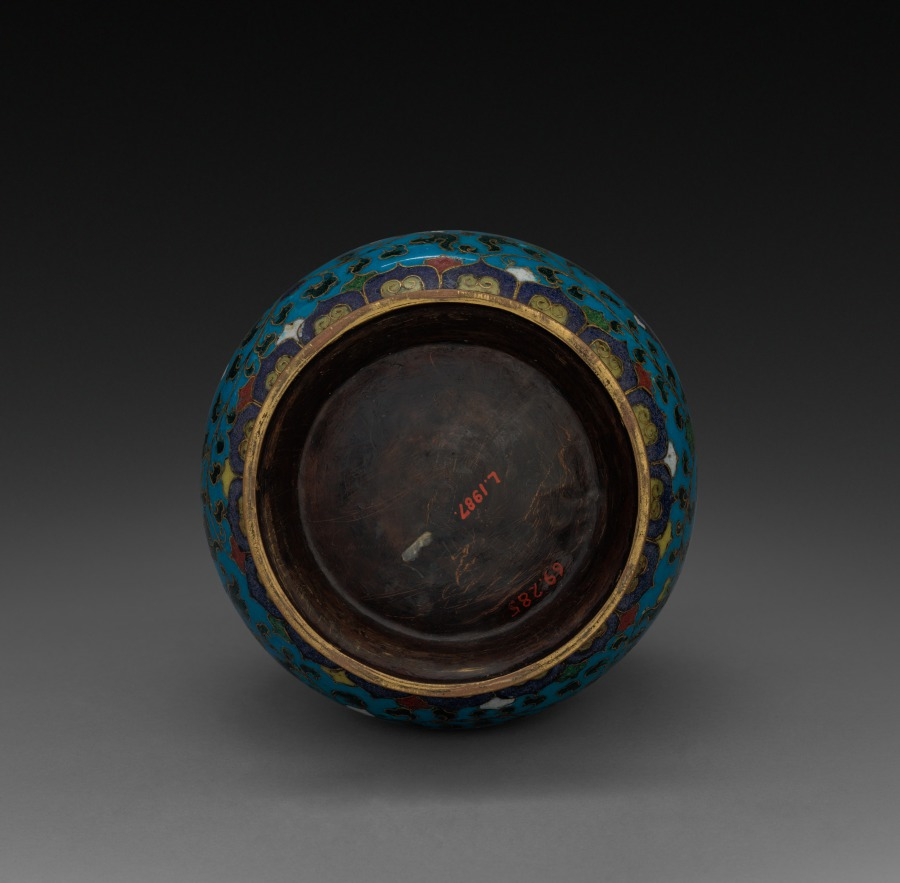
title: Vase with Floral Scrolls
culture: China, Ming dynasty (1368–1644)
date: 1600s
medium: cloisonné enamel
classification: Enamel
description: In cloisonné enameling, the decorative patterns are outlined by soldering metal wires (usually copper) to a metal base, creating a network of cells, or cloisons, to be filled with powdered enamels. Here. a turquoise ground separates the stylized chrysanthemum flower and leaf pattern, which winds around the neck and body. After firing, the enamels are polished to create a smooth surface level with the cloisons. The exposed metal surfaces are gilt.